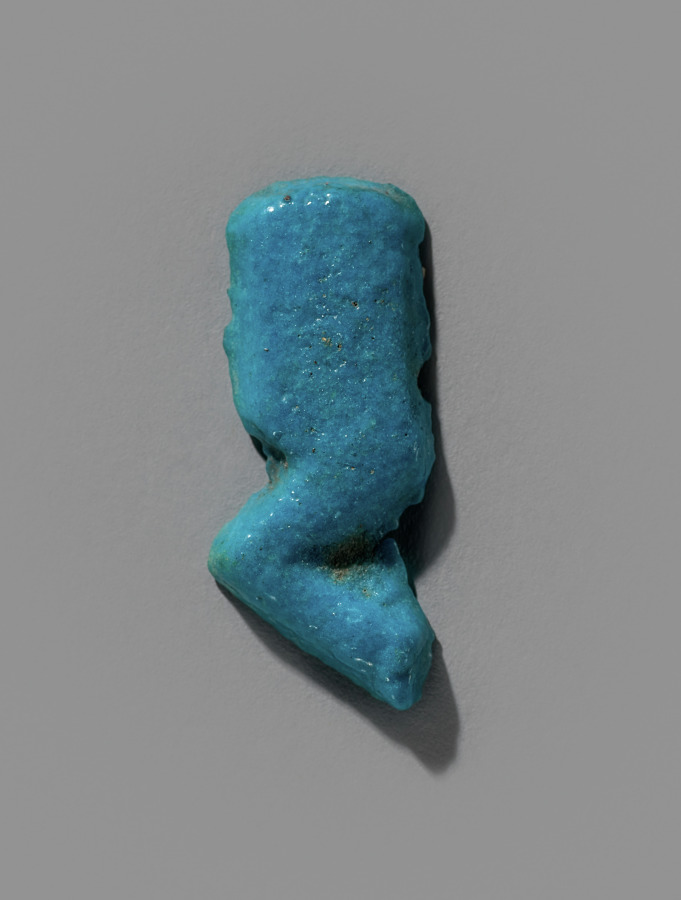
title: Food Model Amulet: Haunch of Beef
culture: Egypt, New Kingdom (1540–1069 BCE), Dynasties 19–20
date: 1295–1069 BCE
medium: turquoise faience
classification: Amulets